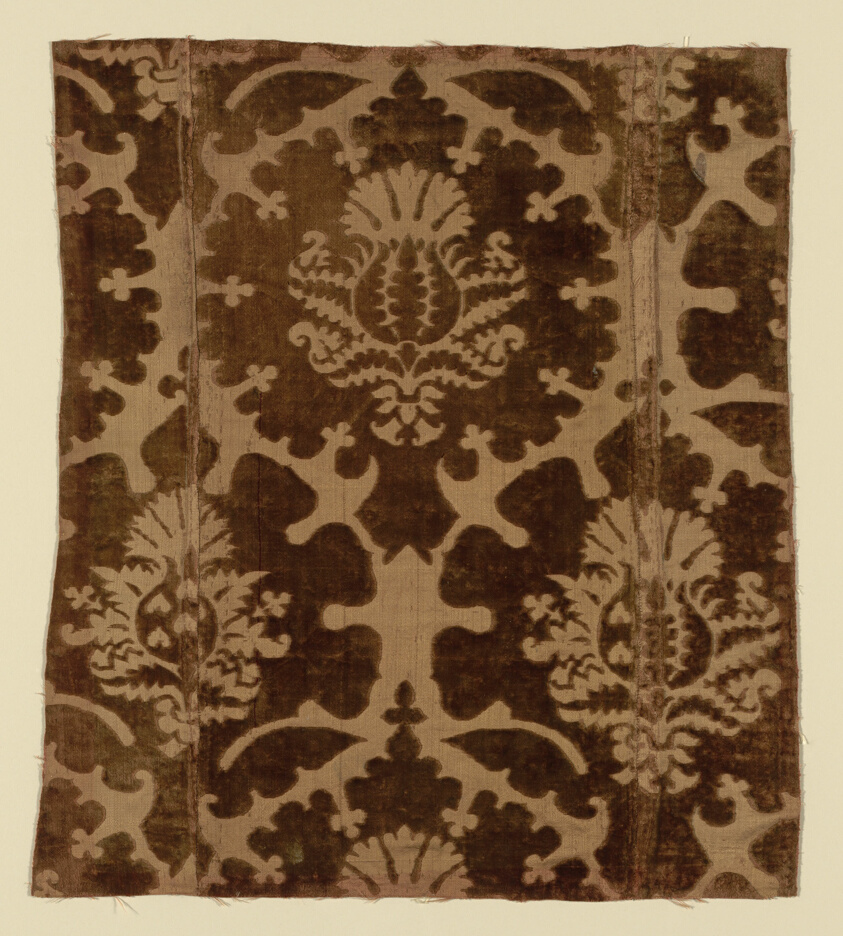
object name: Textile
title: Fragment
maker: Italy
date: 1475/1525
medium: Silk, cut, and voided velvet against satin weave foundation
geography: Italy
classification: textile; weaving - velvet